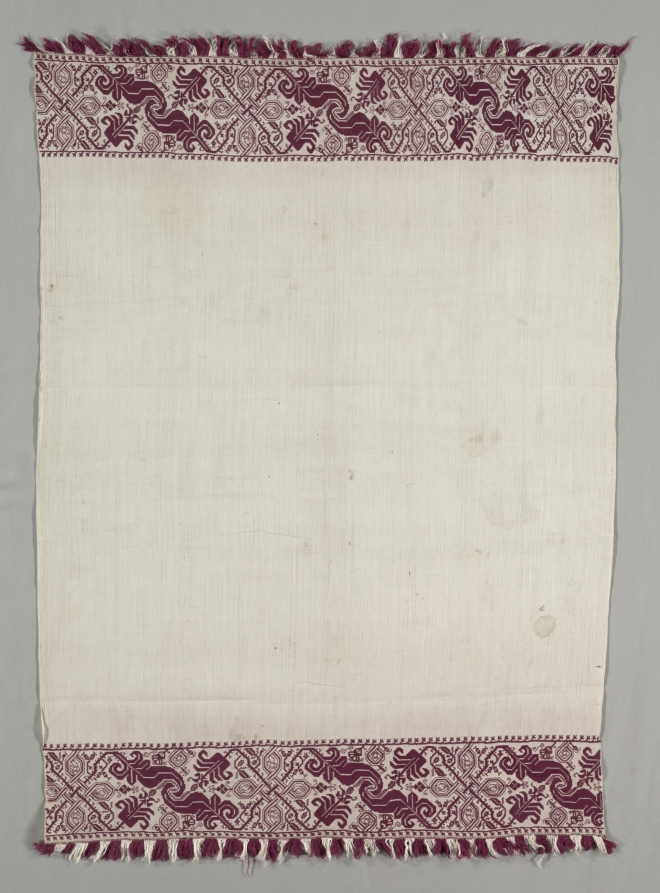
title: Embroidered Towel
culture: Italy, 17th century or later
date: 1600s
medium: embroidery; silk on linen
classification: Embroidery